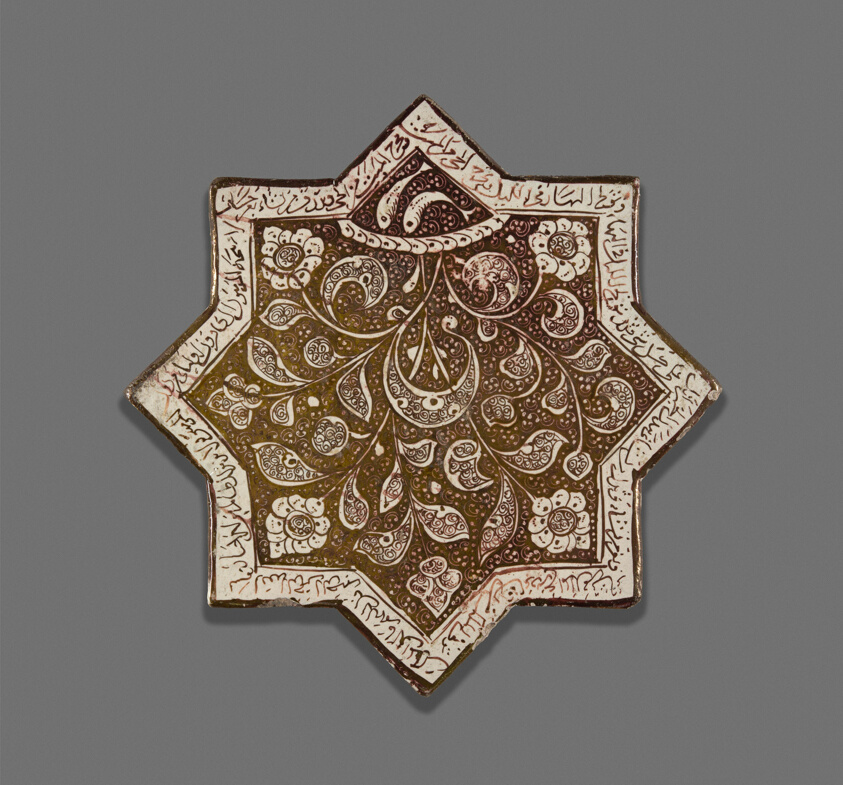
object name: Architectural fragment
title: Star-Shaped Tile with Qur'anic Inscriptions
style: Islamic (culture or style)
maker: Iran; Kashan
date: Ilkhanid dynasty (1256–1353), Mid-13th century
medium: Lusterware, fritware painted in lustre over an opaque white glaze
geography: Iran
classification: earthenware; asian art; ceramics; decorative arts